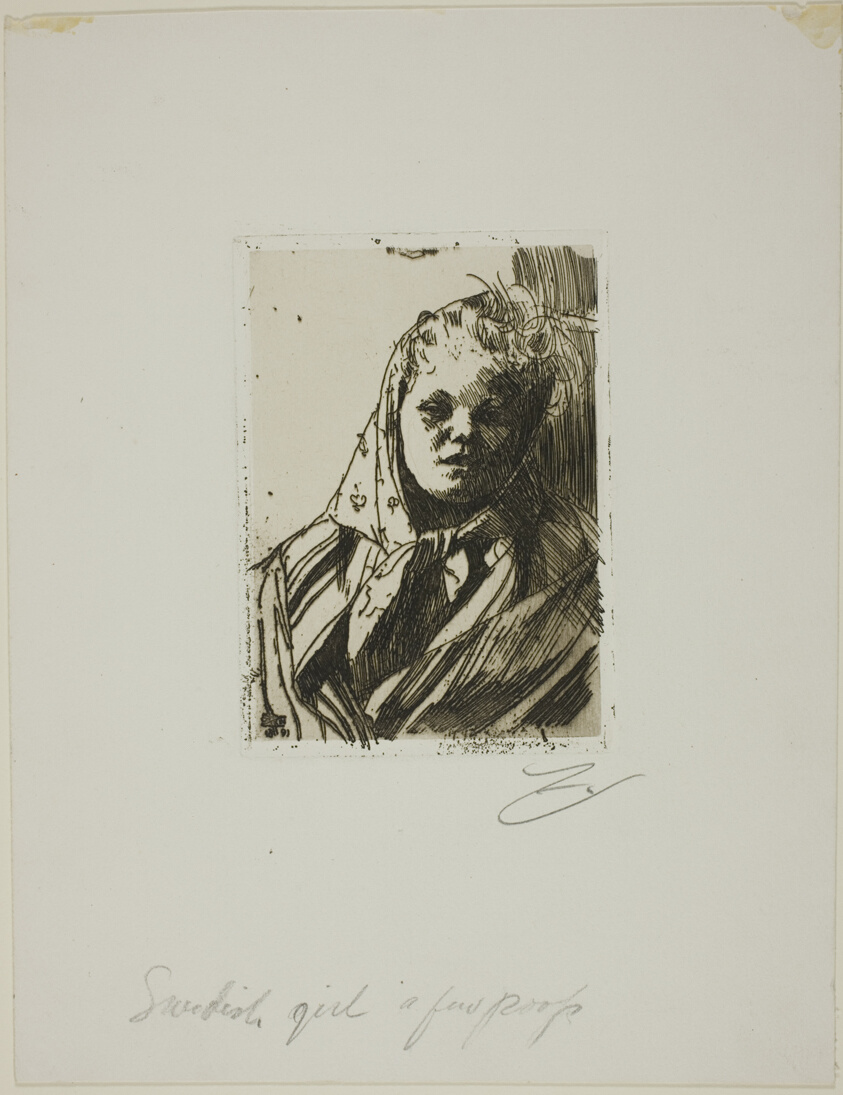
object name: Print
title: Dalecarlian Peasant Woman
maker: Anders Zorn (Swedish, 1860-1920)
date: 1891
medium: Etching on white wove paper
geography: Sweden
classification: etching; print; prints and drawing